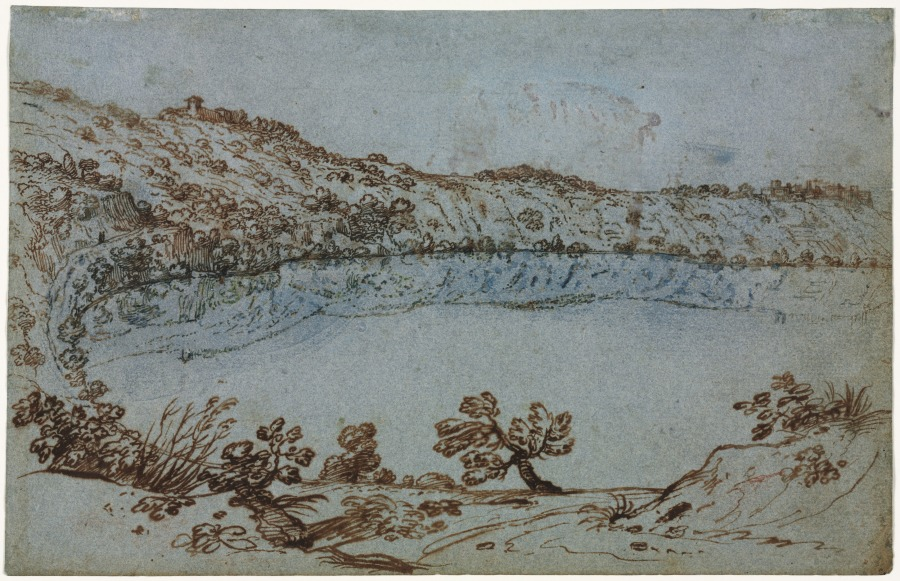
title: View of Lake Nemi (recto) Small Group of Roman Ruins (verso)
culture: Italy, 17th century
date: c. 1650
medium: pen and brown ink with brush and blue wash (discolored to green in places) (trace of red chalk unrelated to composition)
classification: Drawing